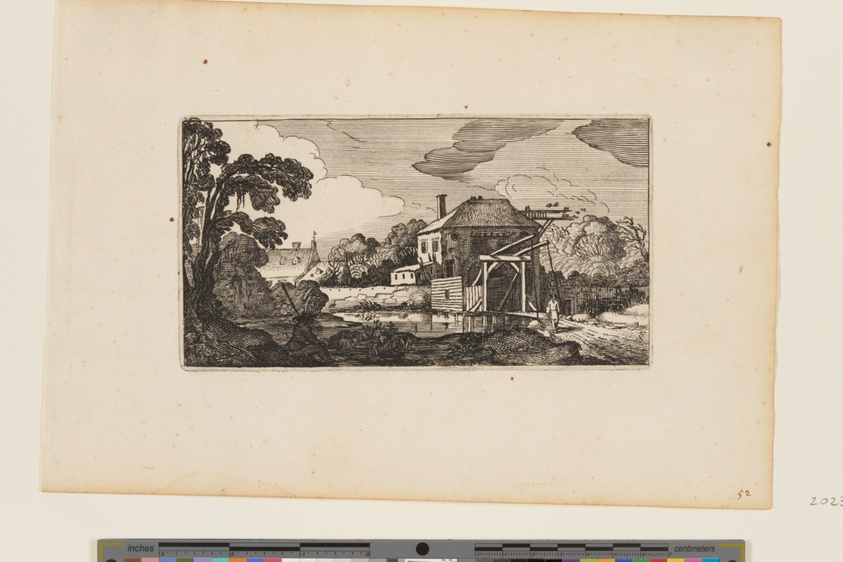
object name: Print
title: Pond before Wooden Bridge and a House, from Twelve landscapes with Figures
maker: After Gillis van Scheyndel; Dutch, 1595–1660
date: 1624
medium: Etching on ivory laid paper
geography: Netherlands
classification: etching; paper; print; prints and drawing